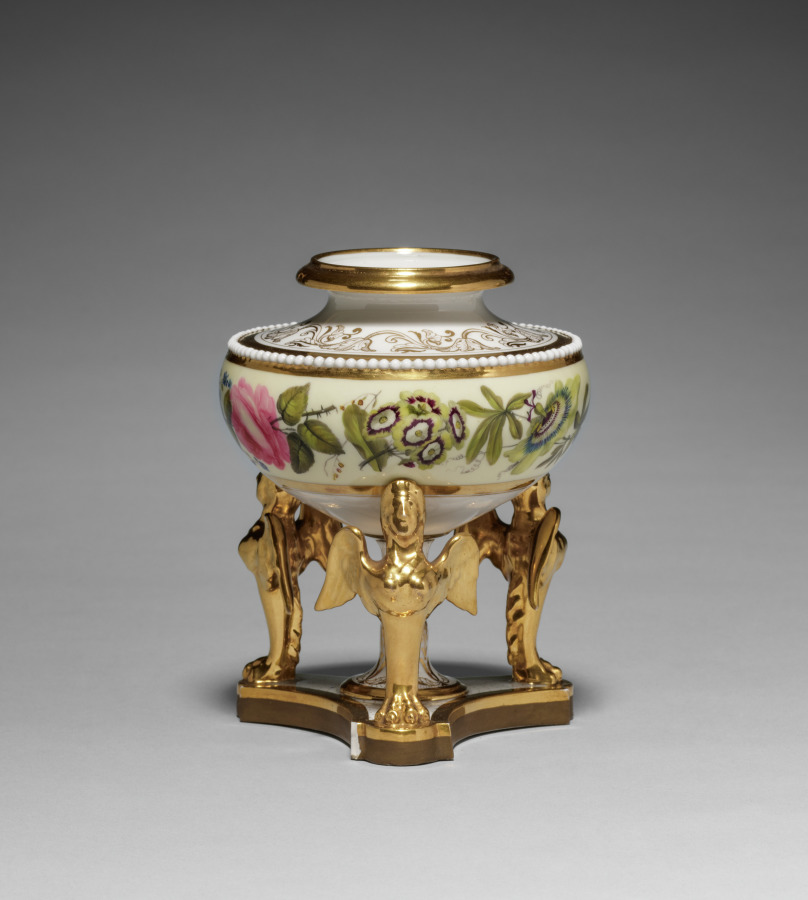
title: Urn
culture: England, Worcester, 19th century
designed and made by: Flight, Barr and Barr (British)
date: c. 1815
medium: artificial porcelain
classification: Ceramic